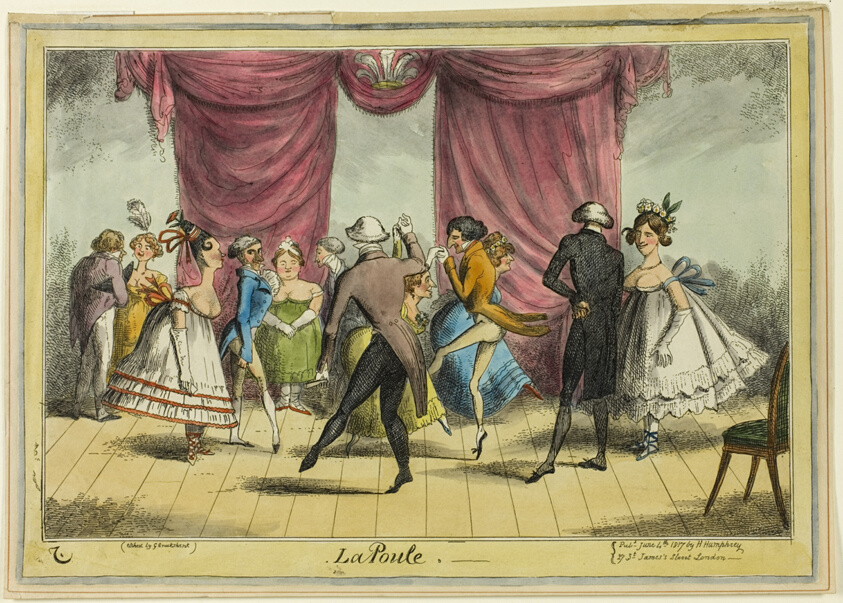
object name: Print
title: La Poule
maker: George Cruikshank (English, 1792-1878); published by Hannah Humphrey (English, c. 1745-1818)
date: published June 4, 1817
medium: Hand-colored etching on paper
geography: England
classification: etching; print; prints and drawing